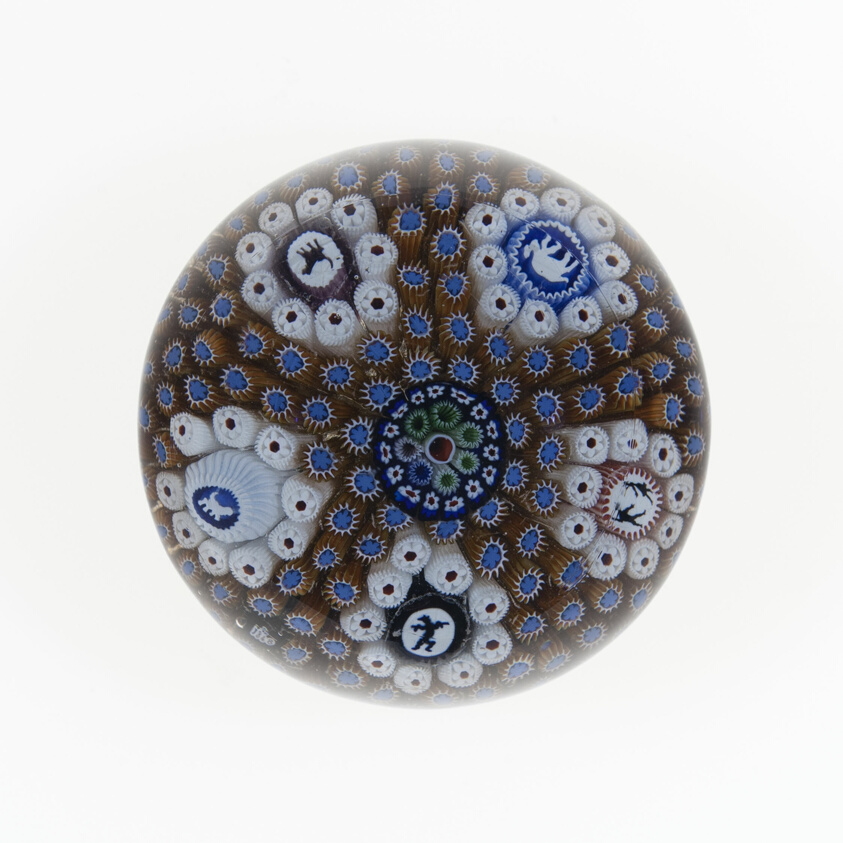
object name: Glass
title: Paperweight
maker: Saint-Louis Glassworks (Cristalleries de Saint-Louis); Lorraine, France, founded 1586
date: c. 1845–60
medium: Glass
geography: Saint-Louis-lès-Bitche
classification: paperweight; glass